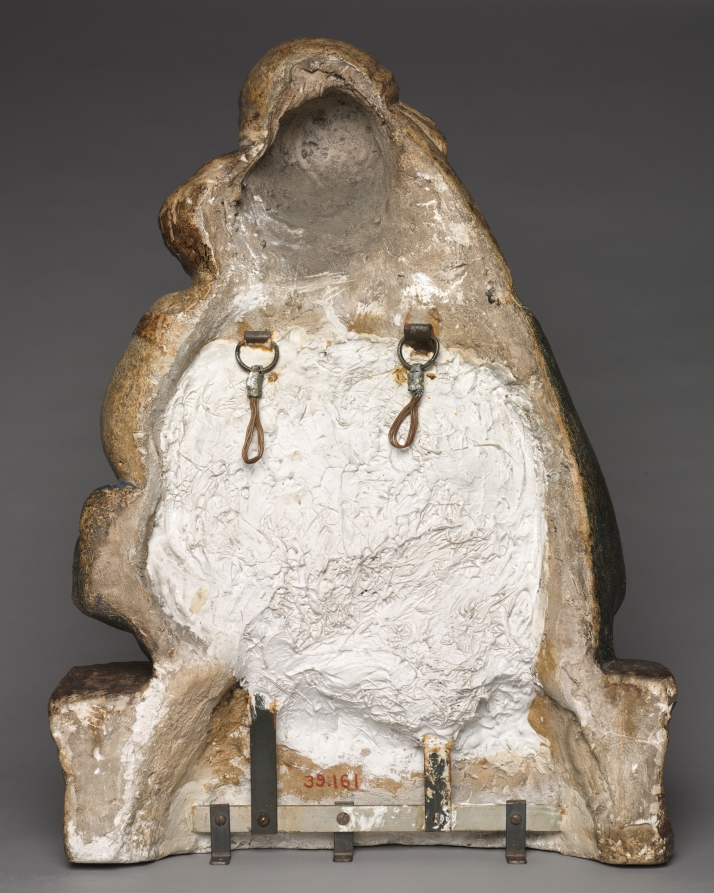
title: Madonna and Child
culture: Italy, Florence, 15th century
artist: circle of Lorenzo Ghiberti (Italian, 1378–1455)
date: c. 1450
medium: polychromed terracotta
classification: Sculpture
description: This half-length Madonna represents one of the finest of about 40 surviving variants, all of which display many characteristics of the Florentine bronze sculptor Lorenzo Ghiberti. These features include serene facial types with narrow eyes and thin eyebrows, the careful arrangement of the Madonna and Child, forehead to cheek, and the infant's twisting pose. The popularity of this devotional relief began around 1420 and continued until around 1500. Ghiberti was the most successful bronze sculptor of the early Renaissance in Florence. His fame rests upon the commissions he received for two sets of bronze doors, completed between 1401 and 1424, for the Baptistry in Florence. The reclining figure of Eve on the base of this Madonna and Child (suggesting Mary as the new Eve) stems from a similar figure on the upper left door of the Porta del Paradiso, the second set of Baptistry doors. Eve's presence on the base clearly substantiates the attribution to Ghiberti and helps date the relief.